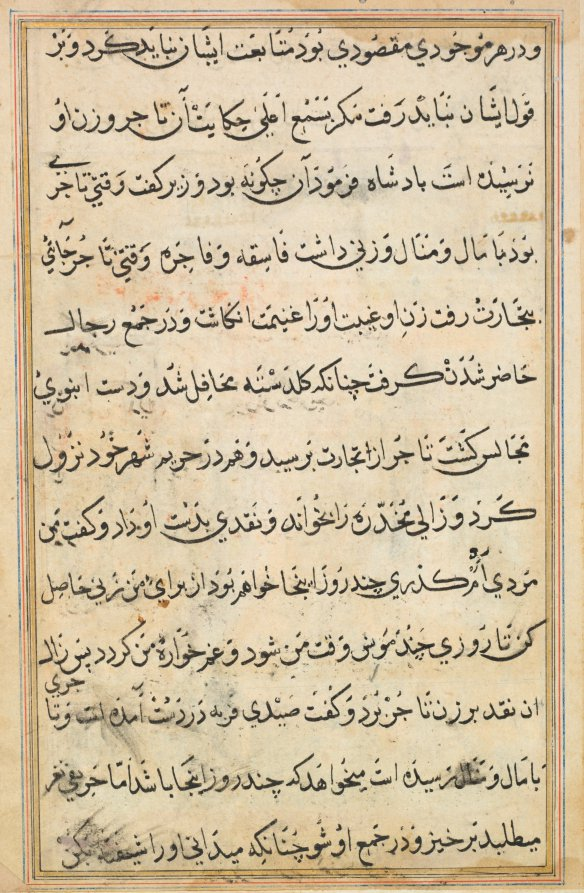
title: Page from Tales of a Parrot (Tuti-nama): text page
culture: Mughal India, court of Akbar (reigned 1556–1605)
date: c. 1560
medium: gum tempera, ink, and gold on paper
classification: Painting